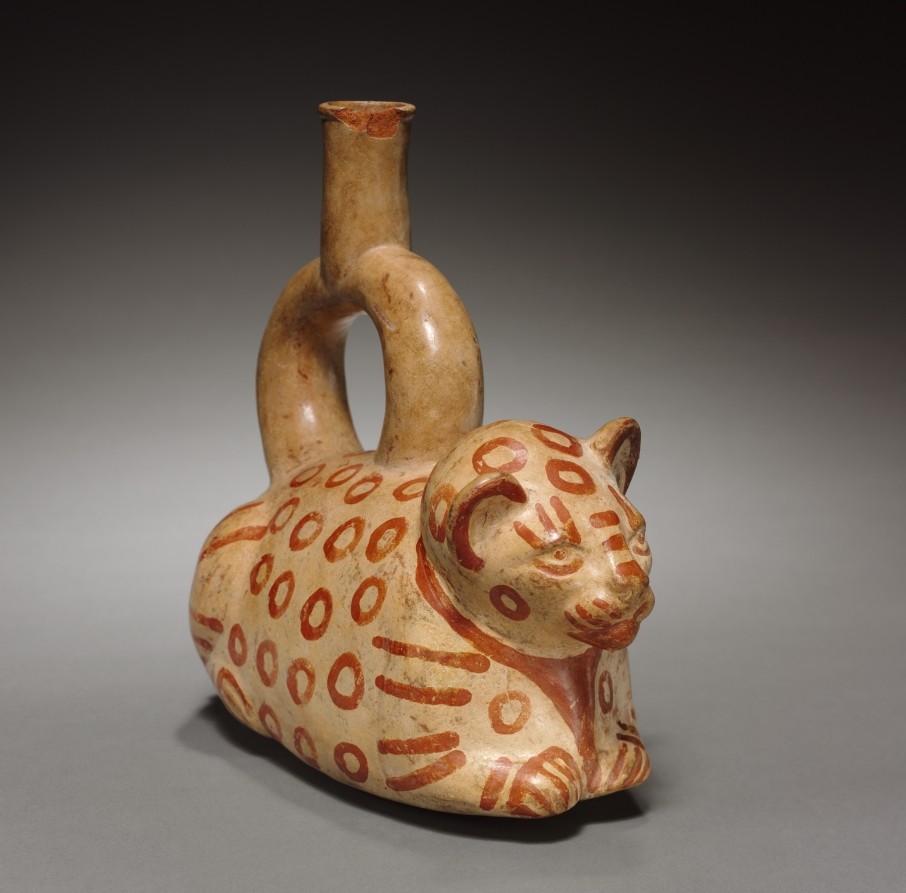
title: Stirrup Spouted Vessel of Feline Form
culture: Peru, Mochica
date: 1–1000 CE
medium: red earthenware decorated with cream-colored slip and brown pigment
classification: Ceramic